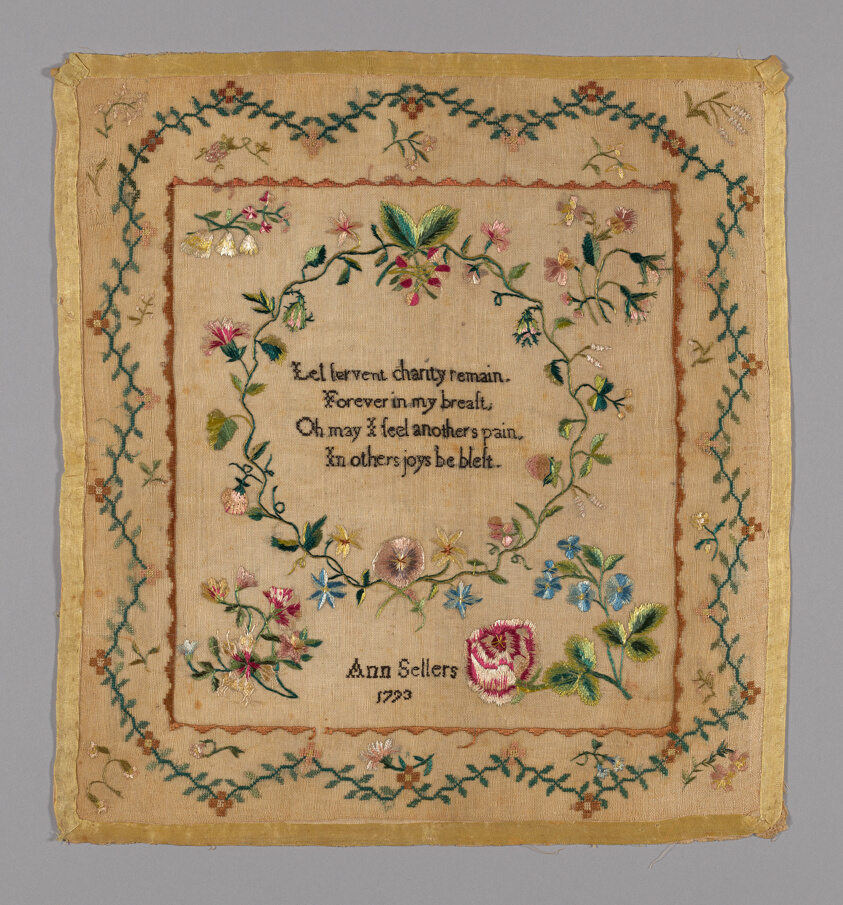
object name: Textile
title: Sampler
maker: Ann Sellers (American, 1783-1870); United States, Pennsylvania, Philadelphia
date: 1793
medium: Linen, plain weave; embroidered with silk in cross, satin, individual satin, split, and stem stitches; edged with silk, plain weave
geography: Pennsylvania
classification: textile; needlework (visual works); sampler